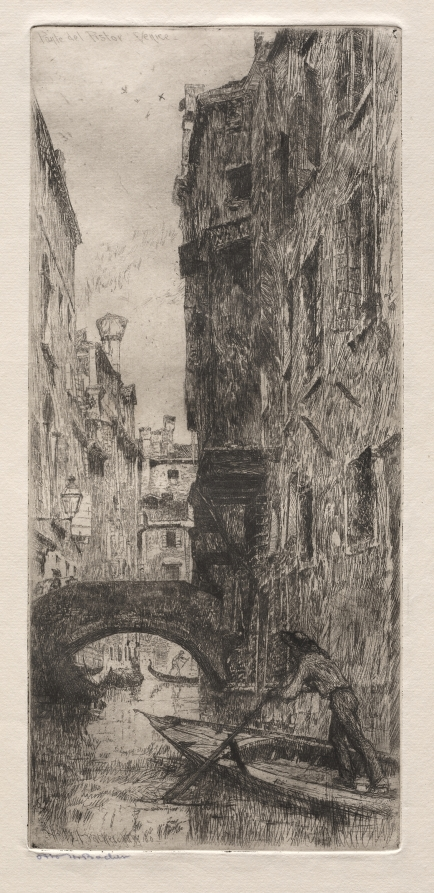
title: Etchings of Venice: Ponte del Pistor, Venice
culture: America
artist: Otto H. Bacher (American, 1856–1909)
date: 1880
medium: etching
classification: Print